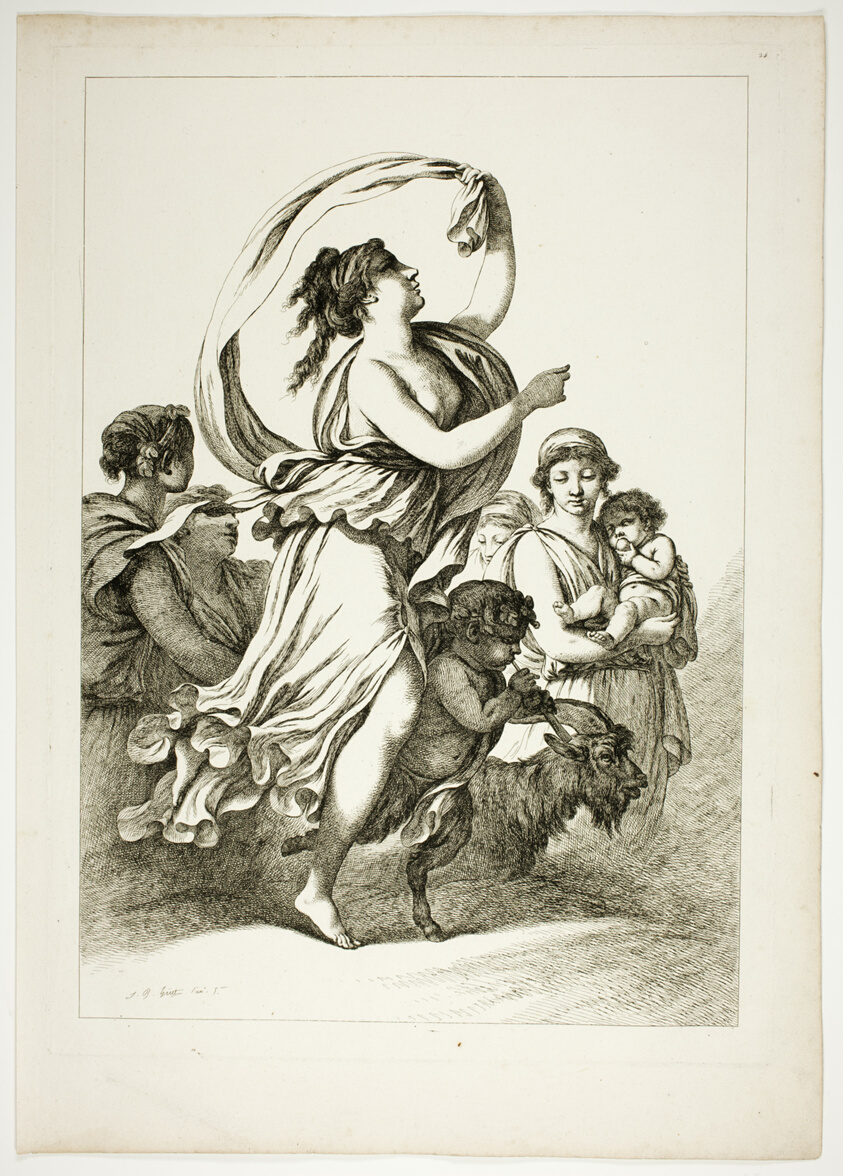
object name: Print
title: Plate 24 of 38 from Oeuvres de J. B. Huet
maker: Jean Baptiste Huet (French, 1745-1811)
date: 1796–99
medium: Etching on paper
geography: France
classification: etching; print; prints and drawing